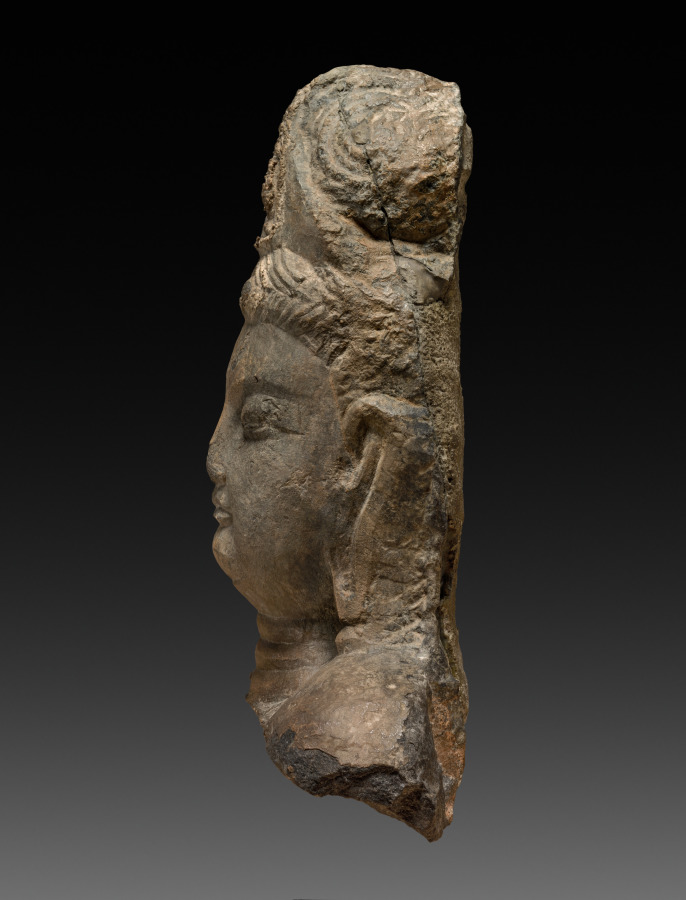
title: Head of Bodhisattva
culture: China, from Lung-mên, Tang dynasty (618-907)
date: 618–907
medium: dark gray limestone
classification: Sculpture